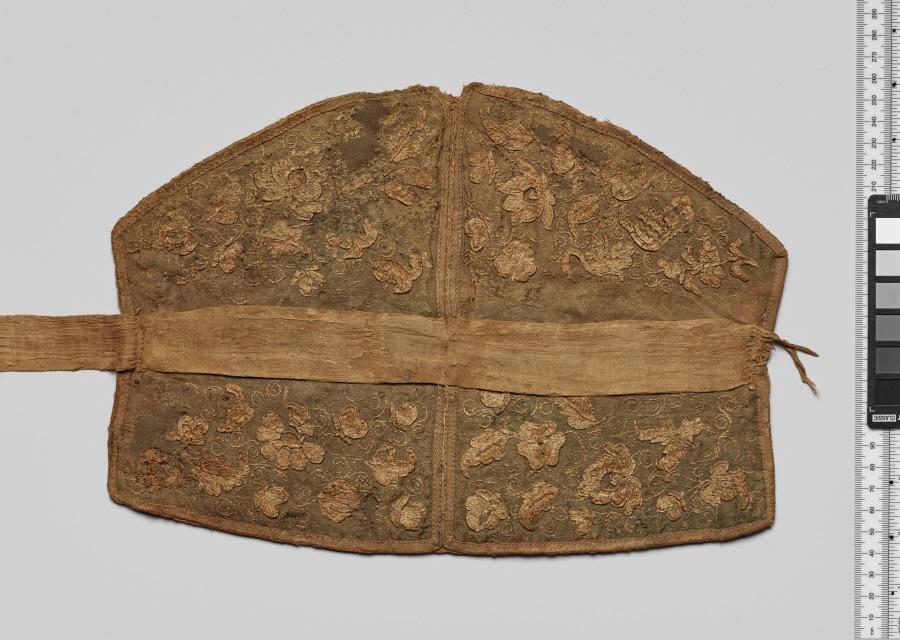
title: Headpiece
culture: China, Liao dynasty (907-1125)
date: 907–1125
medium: embroidery, silk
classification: Embroidery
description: Pair of Headpieces Embroidery; silk Liao Dynasty (907-1125) The Cleveland Museum of Art, Gift of Lisbet Holmes 1995.109.a and 1995.109.b (Cat. no. 52) These headpieces are embroidered with butterflies, birds, animals, flowers, leaves, and delicate vine scrolls. In general, the design is related to the theme of the lotus pond, best known from Liao tomb paintings. Paired ducks or geese swimming in water and looking in opposite directions seem to have become popular in the north of China before spreading further south and to Central Asia. On the other hand, recumbent animals looking back are a Central Asian image that migrated to northern China. Headpieces of this shape, intersected by two bands and secured by ties, have a long history in northern China. A gold replica was found in a tomb dating as early as ad 500-550.